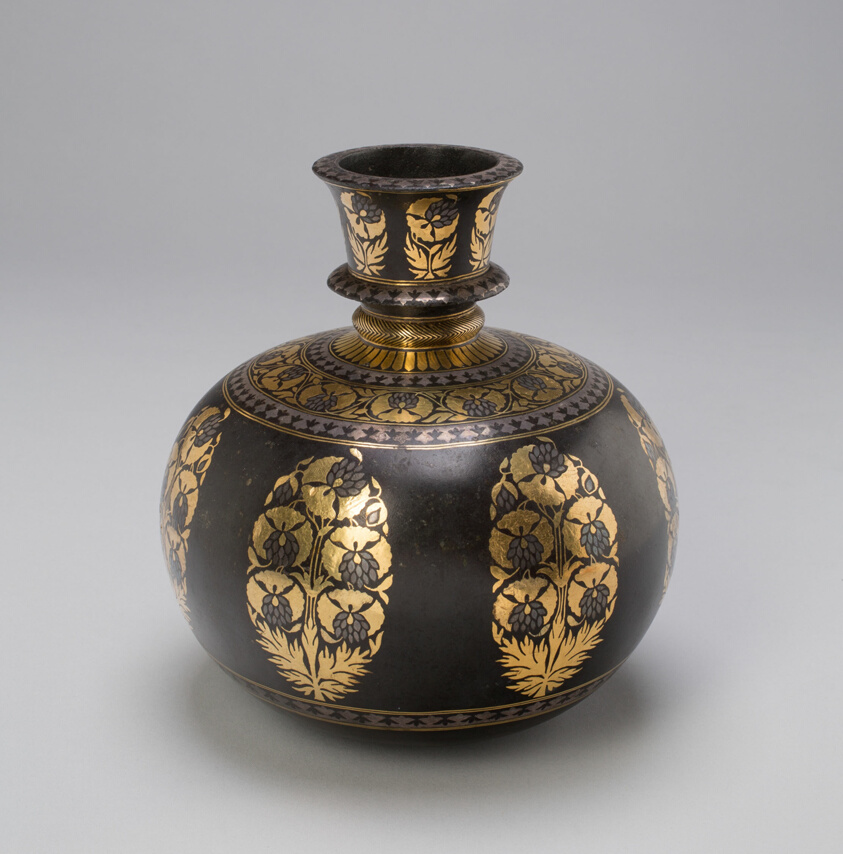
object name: Vessel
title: Globular Huqqa Base with Floral Design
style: South Asian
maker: India; Deccan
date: 19th century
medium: Zinc alloy inlaid with gold and silver (bidriware)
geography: India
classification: vessel